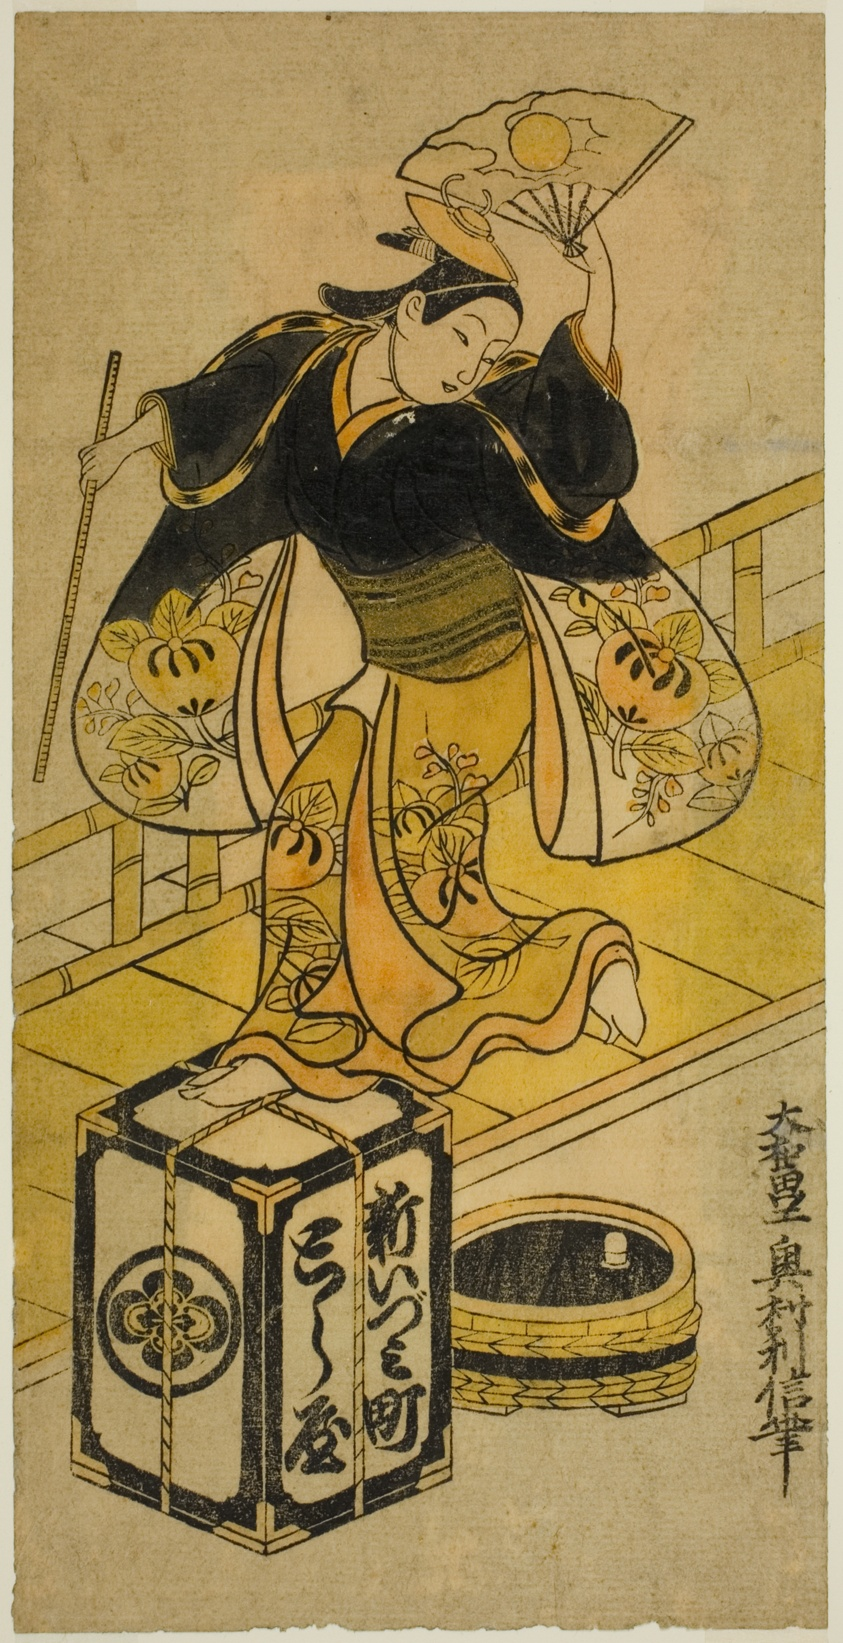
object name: Print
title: Young Man Playing Ushiwaka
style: Japanese (culture or style)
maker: Okumura Toshinobu (Japanese, active c. 1717-50)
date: c. 1725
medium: Hand-colored woodblock print; hosoban, urushi-e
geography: Japan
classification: woodblock print; print; asian art